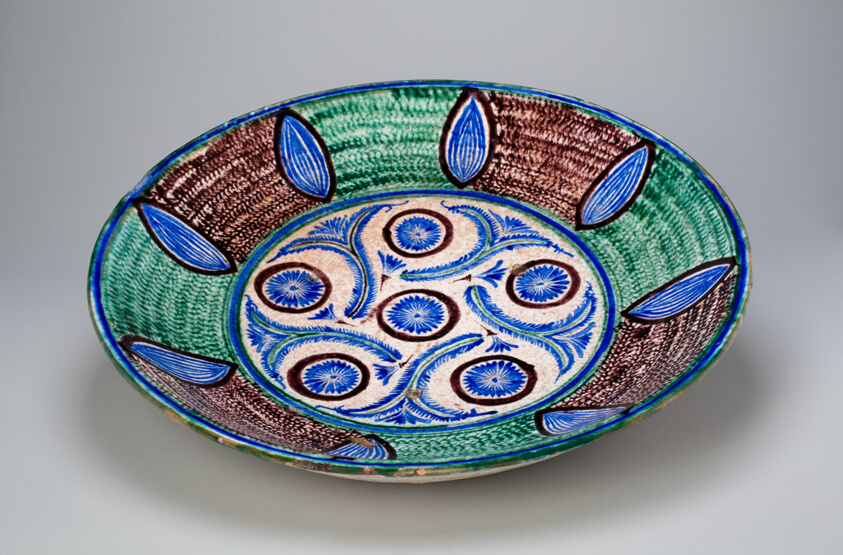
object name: Decorative Arts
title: Large shallow dish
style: Islamic (culture or style)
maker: Uzbekistan; Bukhara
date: 18th/19th century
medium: Reddish stoneware decorated in manganese, green, and cobalt blue enamel on white opaque glaze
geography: Bukhara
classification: dish (vessel); stoneware; asian art; ceramics; decorative arts